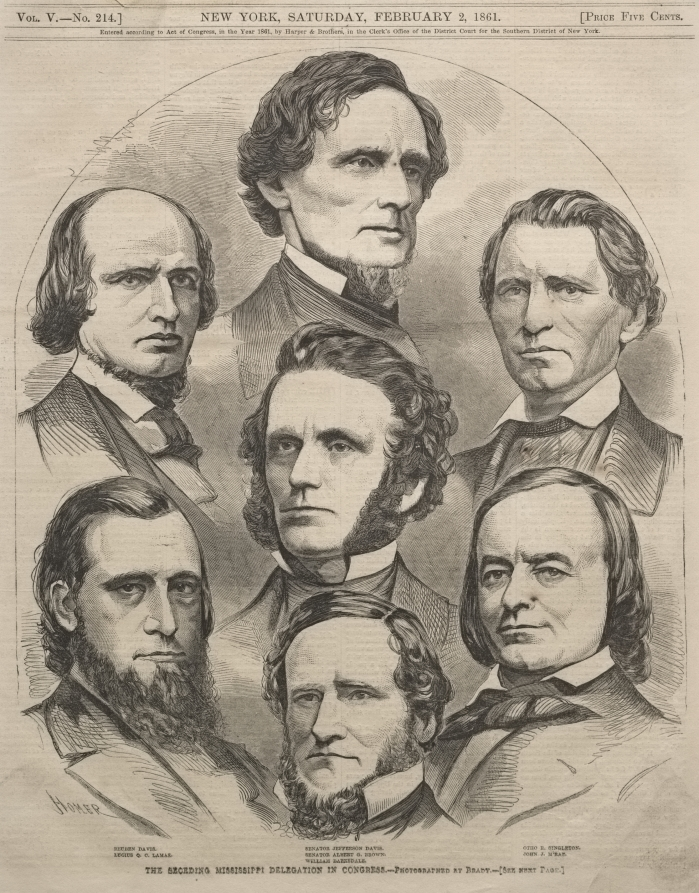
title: The Seceding Mississippi Delegation in Congress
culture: America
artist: Winslow Homer (American, 1836–1910)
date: 1861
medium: wood engraving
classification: Print